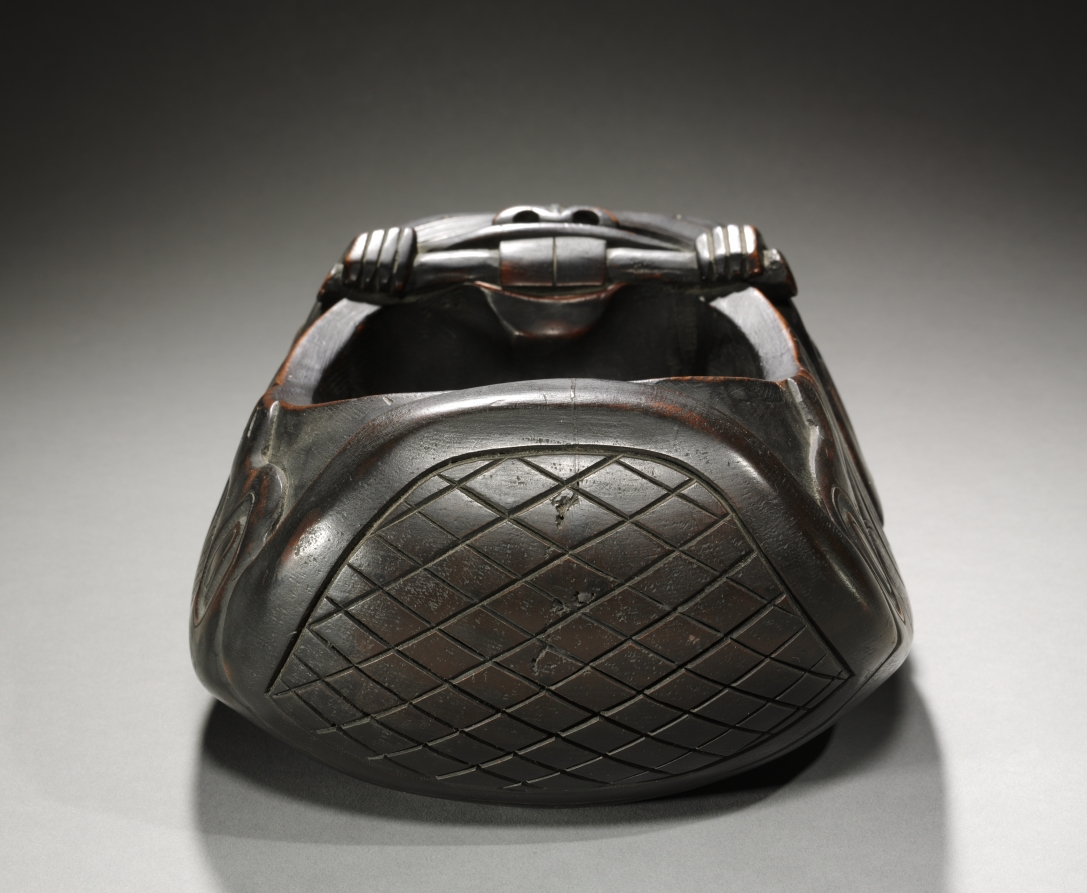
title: Beaver-Shaped Bowl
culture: Native North America, Northwest Coast, Alaska, Tlingit?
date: c. 1890–1920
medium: wood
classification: Wood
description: Bowls were a major Northwest Coast art form, used in many contexts including potlatch feasts that validated the rights and privileges of wealthy noble families. When Euro-American settlement forced a change from traditional to cash economies in the early 1900s, Indigenous carvers turned their skills to creating bowls like this example for the outside market.